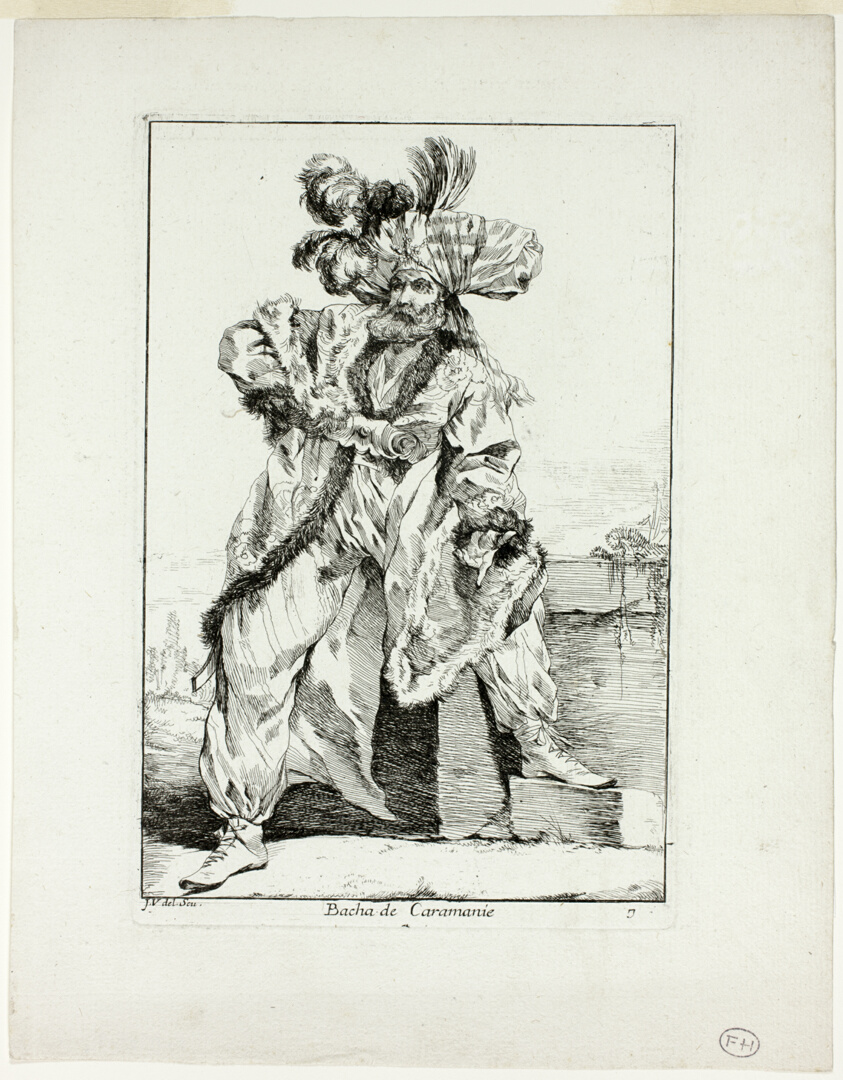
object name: Print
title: Bacha de Caramanie, plate seven from Caravanne du Sultan à la Mecque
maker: Joseph-Marie Vien, the elder; French, 1716–1809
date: 1748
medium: Etching on ivory laid paper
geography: France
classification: etching; paper; print; prints and drawing